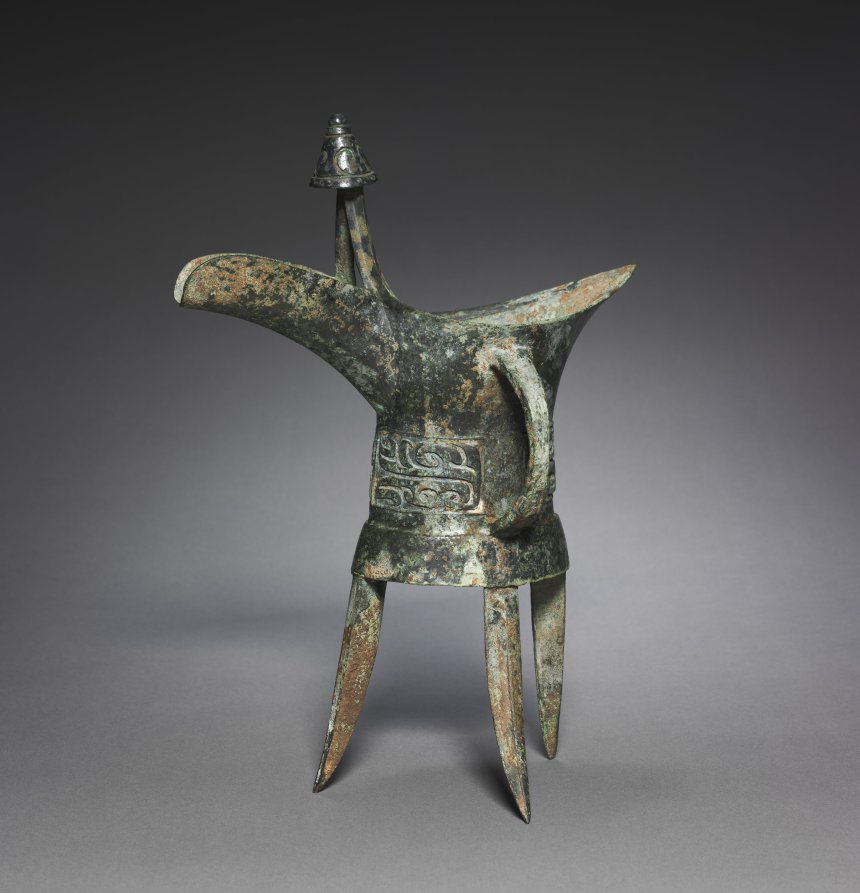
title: Wine Cup (Jue)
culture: China, Shang dynasty (c. 1600–c. 1046 BCE), Erligang phase (c. 1600–1400 BCE)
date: c. 1400 BCE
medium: bronze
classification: Metalwork